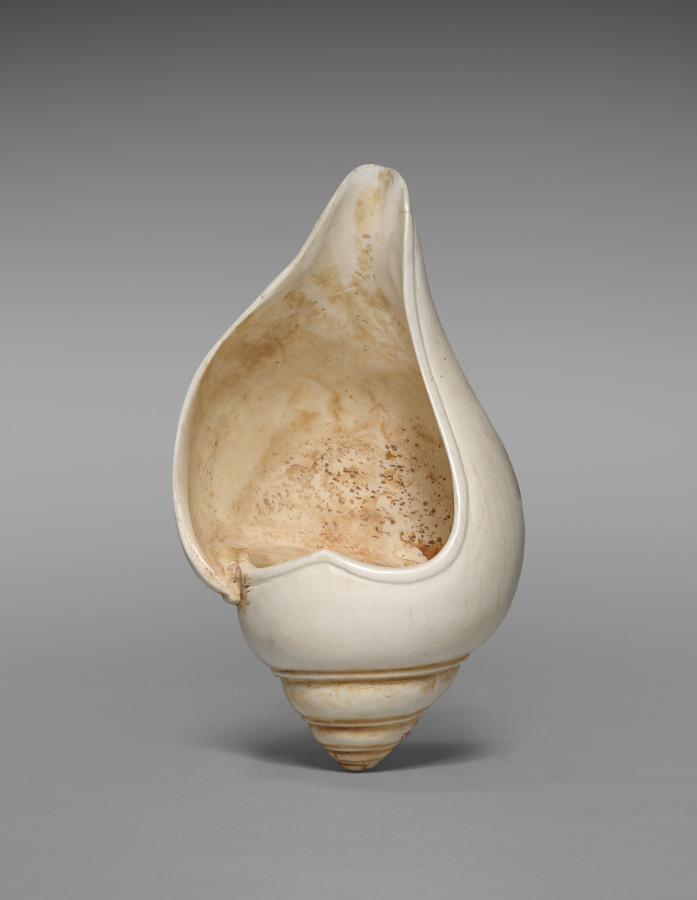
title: Ritual conch shell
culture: Cambodia, Khmer, Angkor Period, 12th-13th Century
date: 1100s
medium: shell and bronze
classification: Sculpture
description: A royal temple like Banteay Chhmar was built for performing rituals and to honor images of gods, Buddhas, and other sacred or enlightened beings for the sake of the kingdom’s protection and ongoing prosperity. Conch shells were blown at the start of rituals to make the sound corresponding to the syllable om. The dancing figure of Hevajra, a Buddhist being of enlightenment with eight heads, sixteen arms, and four legs, has been worked into the bronze embellishment of the shell. Hevajra was elevated to a prominent position in Khmer Buddhism of the Angkorian period as the standard figure denoting the practice of rituals prescribed in a text called the Hevajra-tantra. The tripod stand with three serpents is probably not original to the shell.